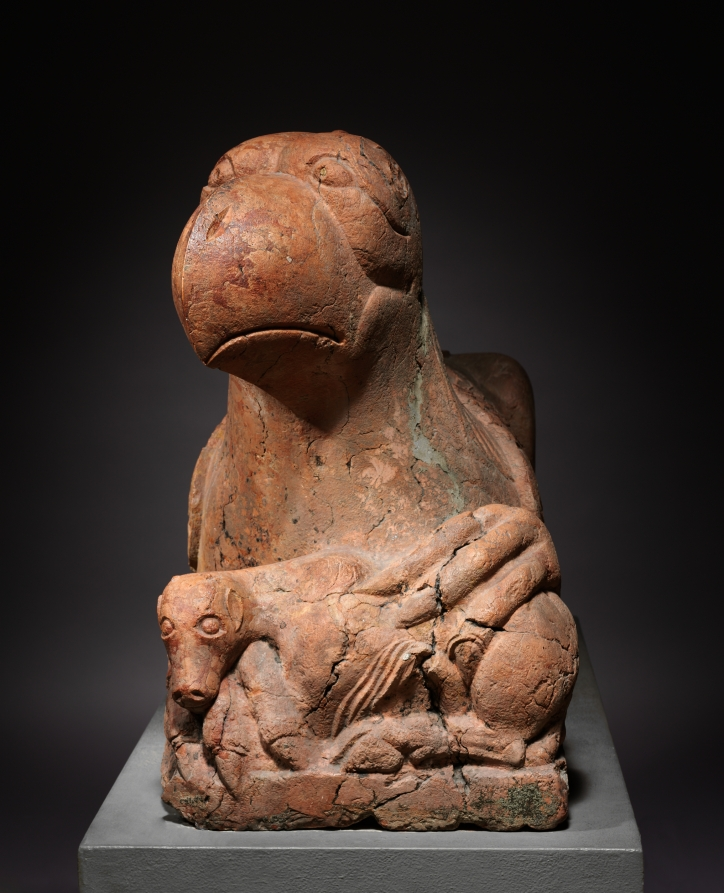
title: Guardian Griffin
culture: Northern Italy, Emilia, 12th century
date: 1150–1175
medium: pink limestone (called "Verona Marble")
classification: Sculpture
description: Griffins are fabled creatures that have the characteristics of an eagle and a lion--combining watchfulness and courage. In Christian art, the dual nature of the griffin was often used to signify that of Christ himself: divine (bird) and human (animal). Griffins were often used as guardian figures in church sculpture and were placed in portals and choir screens. The creatures seen here, with their inward-turning heads, were certainly used for such a purpose. When viewed from the front, one griffin may be seen protecting the figure of a knight between its paws, while the other griffin guards a calf. Their original function was probably to support the columns of a porch in front of a church doorway.